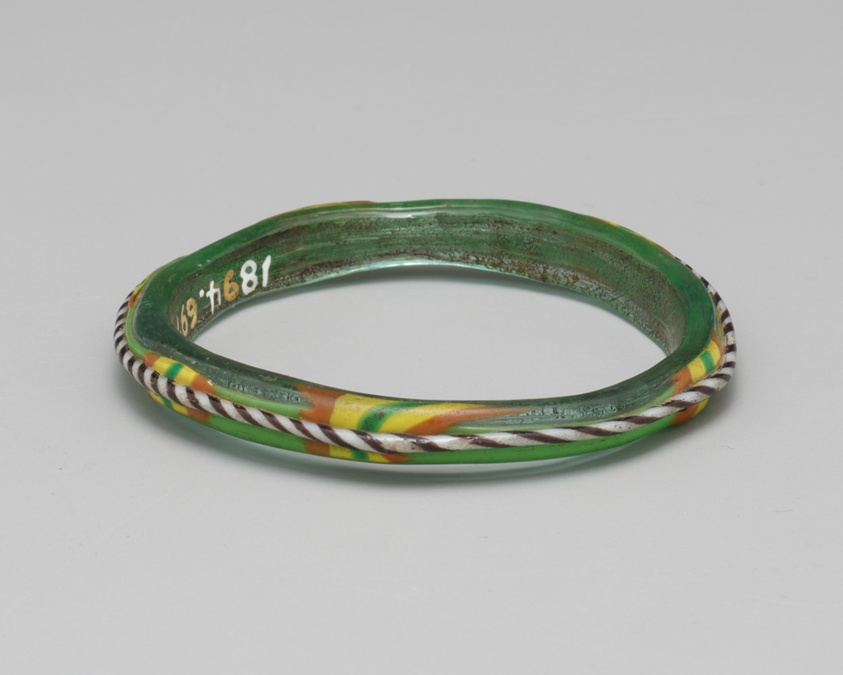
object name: Costume and Accessories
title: Bracelet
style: Islamic (culture or style)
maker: Islamic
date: 14th-15th century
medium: Glass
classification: glass; jewelry; ancient art; costume